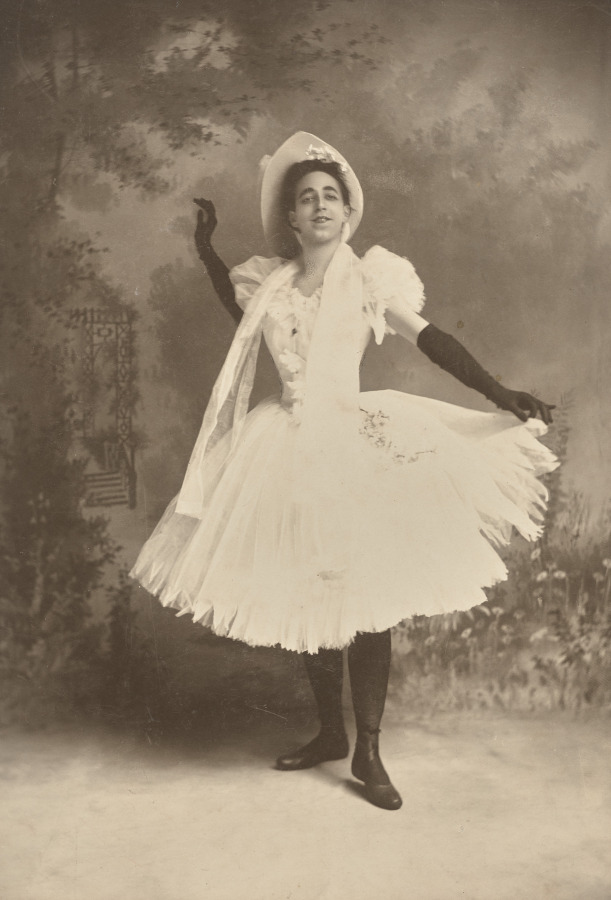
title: Untitled (man posing as a ballerina)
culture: America or England, 19th century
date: 1870s-1880s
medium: woodburytype or gelatin silver print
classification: Photograph